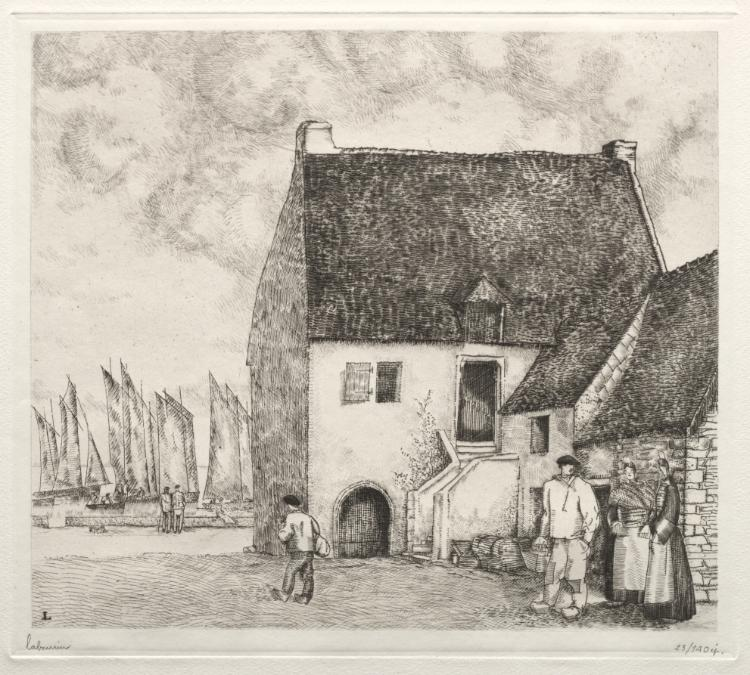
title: Fishermen's Quarters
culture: France, 20th century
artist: Jean-Émile Laboureur (French, 1877–1943)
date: 1933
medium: etching and line engraving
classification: Print